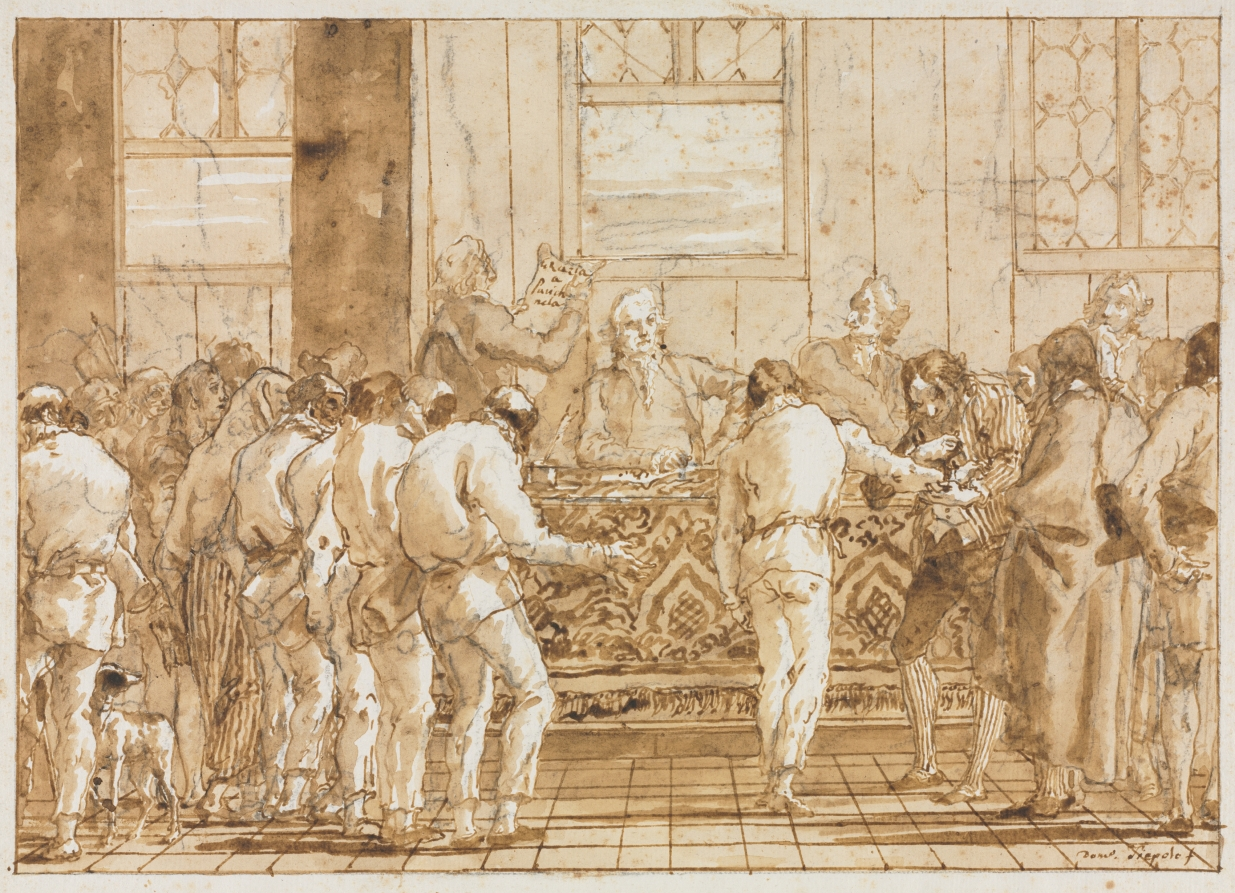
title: The Trial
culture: Italy, 18th century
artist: Giovanni Domenico Tiepolo (Italian, 1727–1804)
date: 1790s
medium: pen and brown ink and brush and brown wash, with black chalk; framing lines in brown ink over graphite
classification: Drawing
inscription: signed, lower right, in brown ink: Dom°. Tiepolo f ; by artist, center, in brown ink: Grazia a Pu[ci?]ch / nela ; upper left, in brown ink: 35 ; upper left, in graphite: o ; lower left, in graphite: -o ; VERSO, upper right, in blue crayon: 6